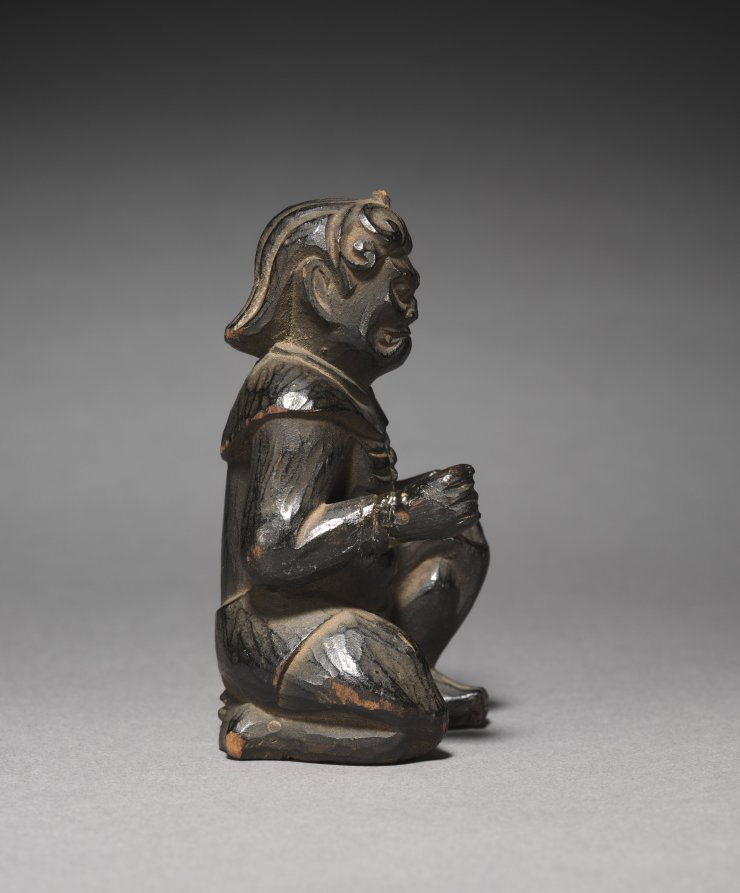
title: En no Gyōja with Zenki and Kōki (Zenki)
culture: Japan, Edo period (1615–1868)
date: 1615–1868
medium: wood and paint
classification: Sculpture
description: This is one of a trio of figures identified as Enno Gyoja and his two attendants, Zenki and Kōki. The set follows the iconography of Shugendo, the traditional mountain ascetic practice in Japan. Enno Gyoja is depicted as a hermit-monk, seated on a rock attached to a modern base. He holds a staff in his right hand and a sutra in the left. The two attendants take the form of half-human, half-demonic figures and are regarded as a married couple.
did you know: This Edo period sculpture shares the iconography and religious function with Seated Zenki and Kōki, CMA 2012.40, from the earlier Muromachi period.